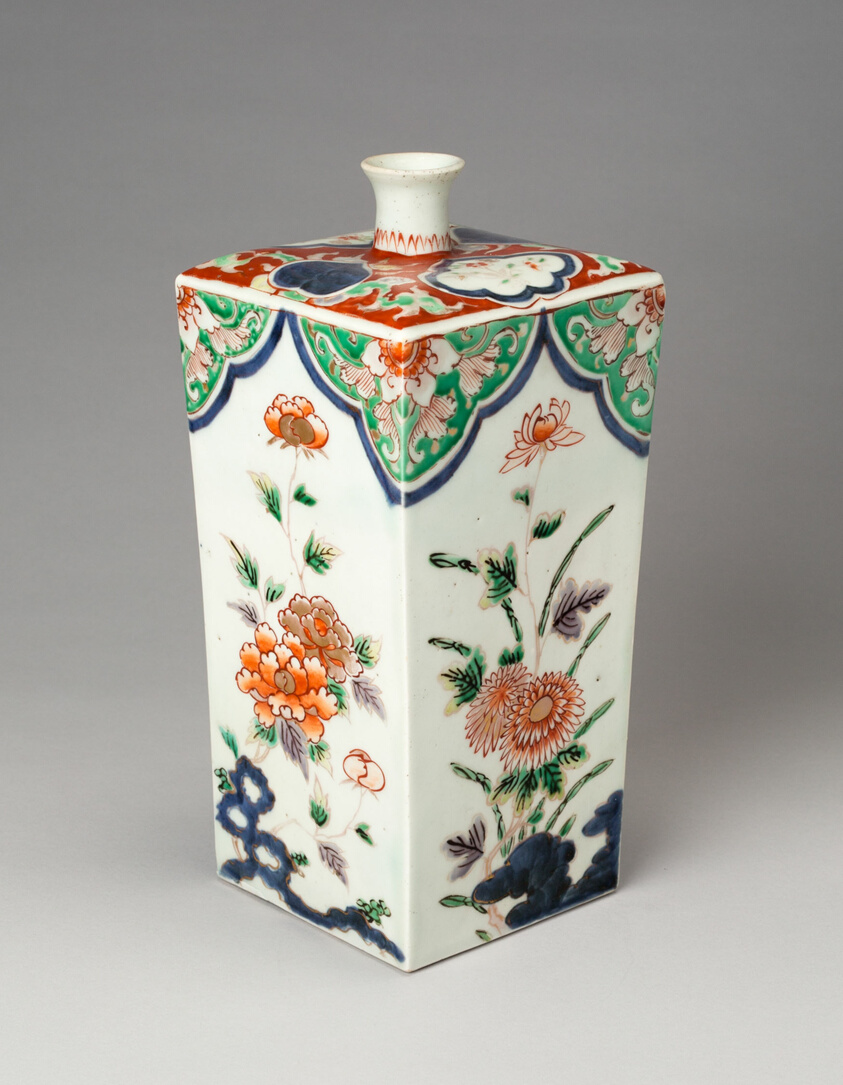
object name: Decorative Arts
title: Imari-Style Hizen Ware Quadrangular Vase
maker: Japan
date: 18th century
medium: Porcelain with cobalt pigment under glaze and enamels over glaze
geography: Japan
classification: vase; porcelain; vessel; asian art; ceramics; decorative arts